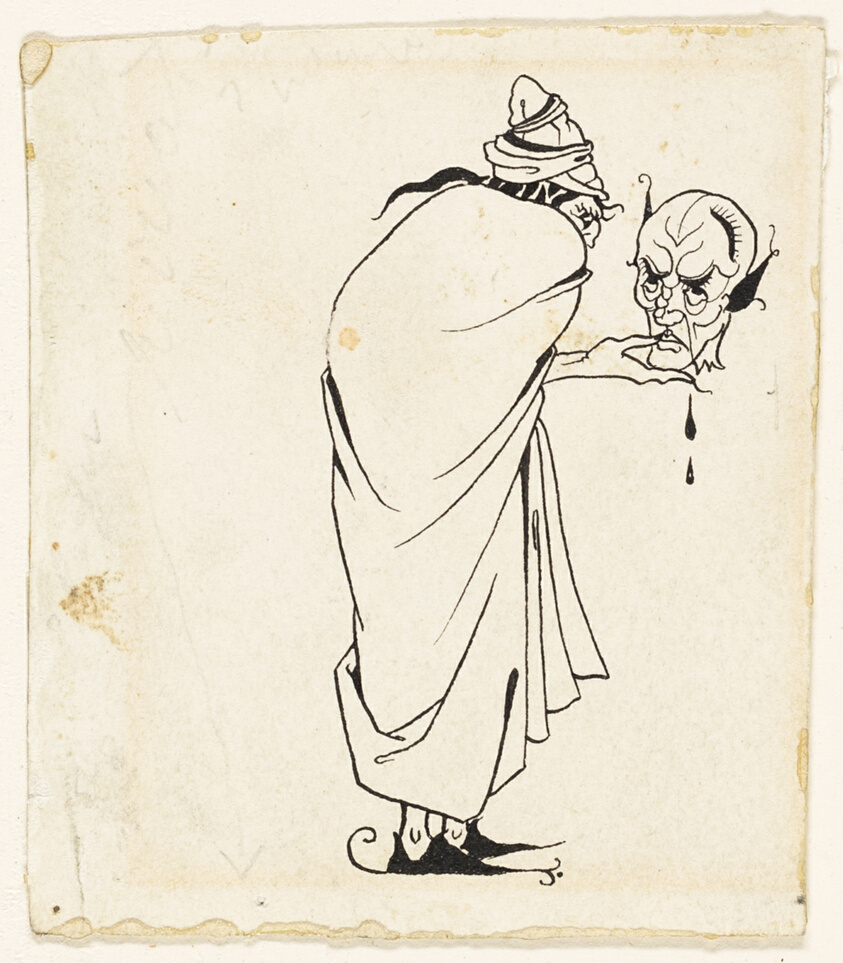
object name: Drawing and Watercolor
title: Man with Skull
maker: Aubrey Vincent Beardsley (English, 1872-1898)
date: 1892/98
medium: Pen and ink on ivory wove paper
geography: England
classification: pen and ink drawings; drawings (visual works); prints and drawing